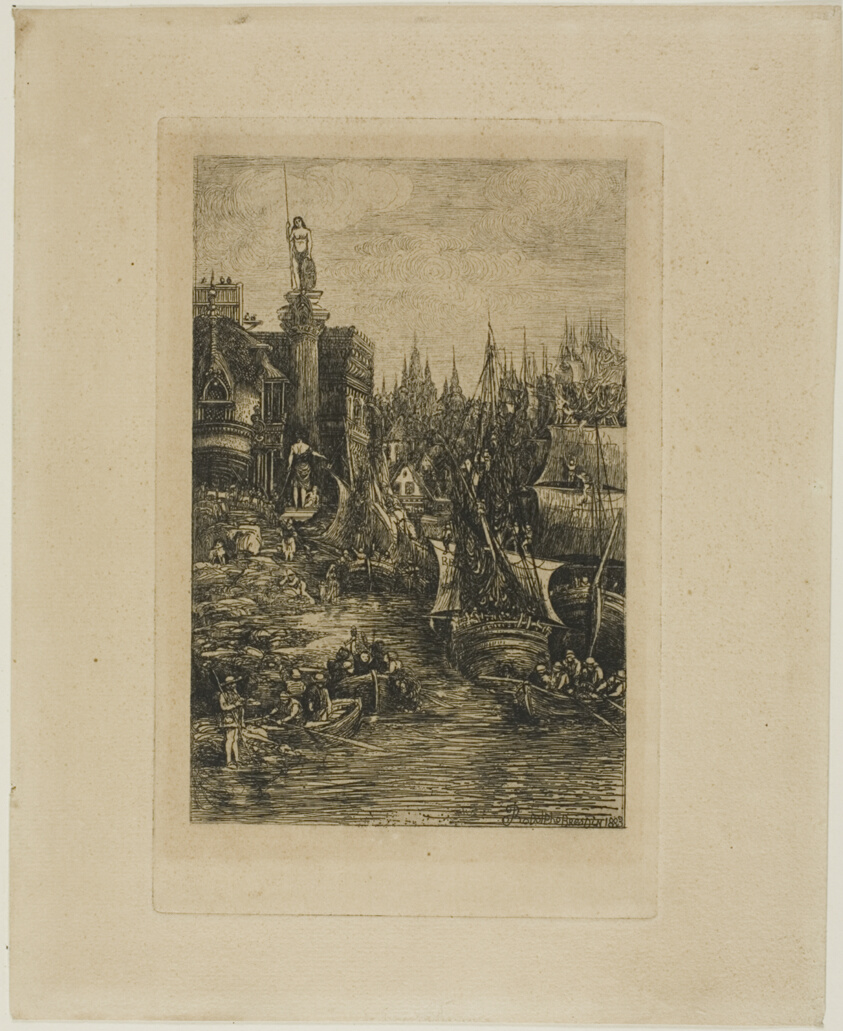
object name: Print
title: My Dream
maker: Rodolphe Bresdin (French, 1825-1885)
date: 1883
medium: Etching on paper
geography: France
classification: etching; print; prints and drawing